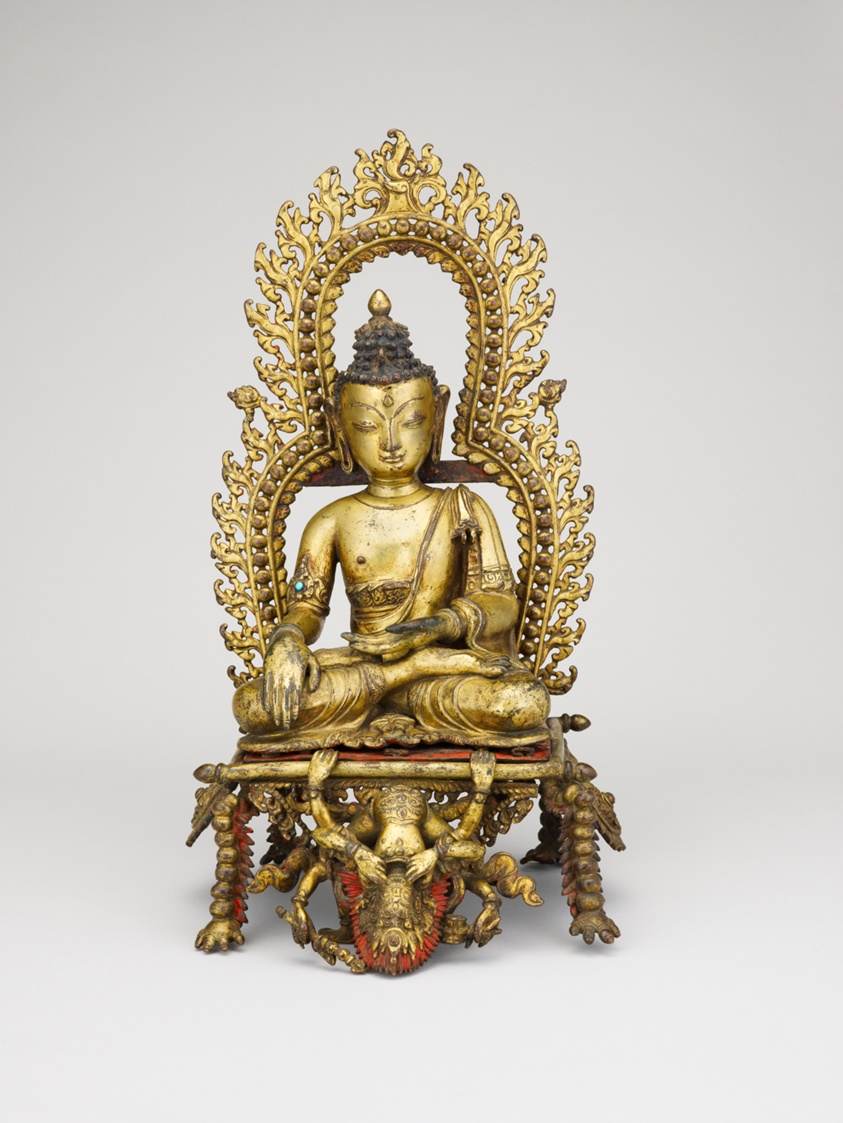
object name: Sculpture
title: Buddha Triumphing over Mara (Maravijaya)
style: Himalayan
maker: Tibet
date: 16th century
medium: Gilt bronze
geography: Tibet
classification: bronze; metal; sculpture; asian art